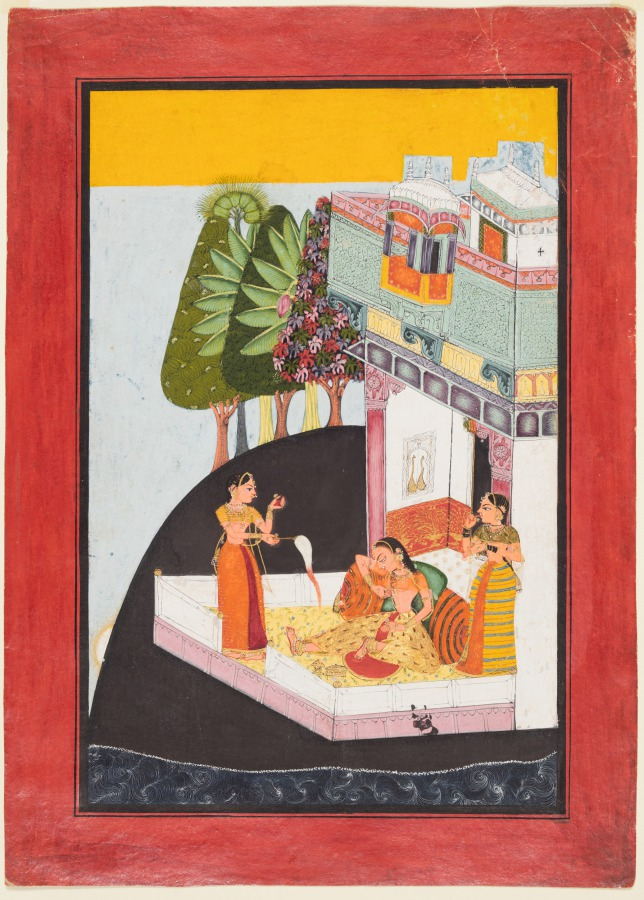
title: A Disconsolate Lady on a Terrace with Attendants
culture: Northwestern India, Rajasthan, Rajput Kingdom of Raghogarh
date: c. 1730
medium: Gum tempera, silver, and gold on paper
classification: Painting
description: This princess is waiting for her lover to arrive. Thinking of him, she touches her breast and her lap, while one attendant keeps flies off with the royal whisk, and the other bites her finger in a gesture of astonishment. The artist has whimsically manipulated elements of the landscape, such as the blazing sun peeking out from behind the flat black hill at the lower left corner, and invading the yellow strip at the top with blocks of blue sky to accommodate the finials of the palace rooftops.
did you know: Her loose hair and seating posture with one leg outstretched indicate that she is losing hope.